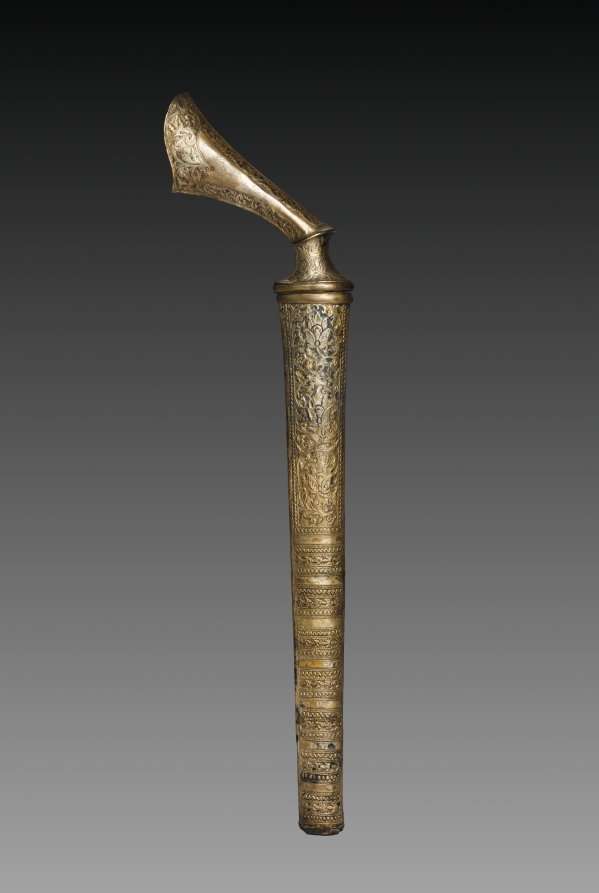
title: Knife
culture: Sumatra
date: 1500s–1800s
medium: Blade: steel; handle: copper alloy with silver gilt; scabbard: copper alloy, silver gilt, wood, and textile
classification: Arms and Armor